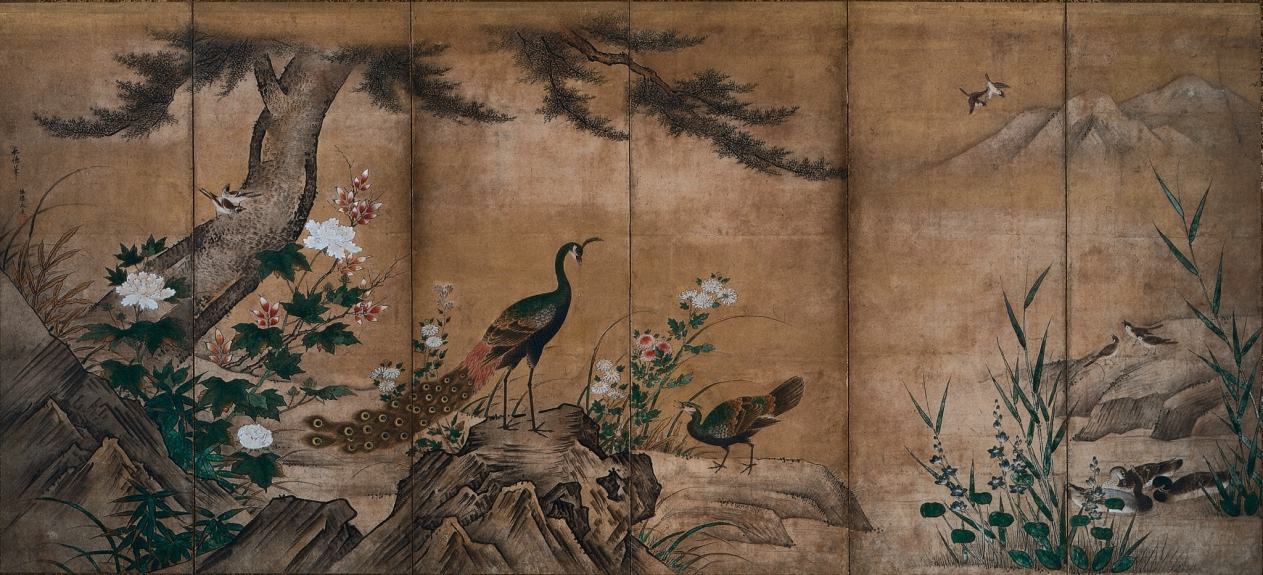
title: Birds and Flowers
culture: Japan, Momoyama period (1573–1615)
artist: attributed to Kano Mitsunobu (Japanese, 1565–1608)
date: late 1500s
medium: One of a pair of six-panel folding screens; ink, color, and gold on paper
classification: Painting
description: The landscape depicted in this pair of screens follows a seasonal progression from right to left, starting with the blossoming plum of early spring and ending with late autumn peonies. A variety of smaller birds are positioned throughout the scene, and a trio of swimming ducks is bracketed by early summer irises and early autumn bellflowers at the center. While some raptors (birds of prey) terrorize a pheasant and an egret (a waterfowl) to the right, a peacock and peahen converse to the left. Hawks are associated with military prowess, while the peafowl suggest cultural prestige.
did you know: As masters of the Kano academic painting style, both Kano Shōei and Kano Mitsunobu favored Chinese-inspired subject matter, such as birds and flowers.